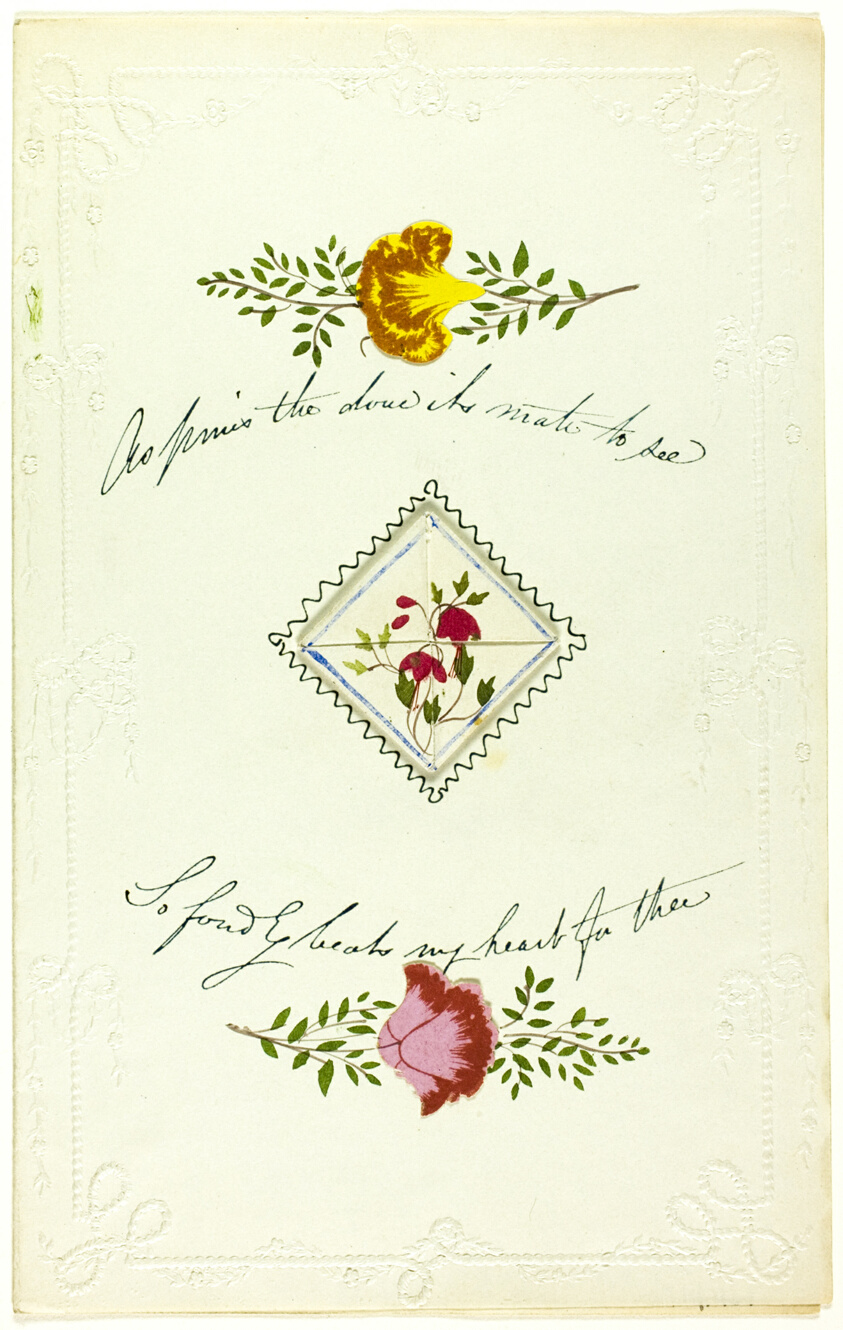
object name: Drawing and Watercolor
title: As Pines the Dove It's Mate to See (valentine)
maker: George Kershaw (English, 19th century)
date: c. 1850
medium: Collage, watercolor, and pen and black ink on embossed ivory wove paper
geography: England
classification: valentine; prints and drawing; paper